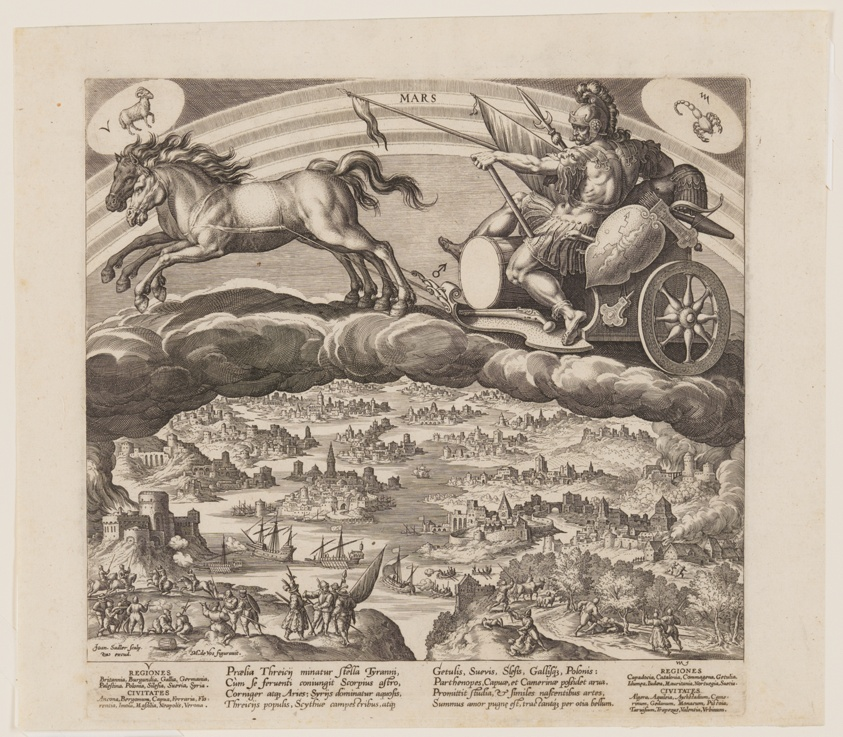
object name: Print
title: Mars, from The Seven Planets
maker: Jan Sadeler I (Flemish, 1550–1600); after Maarten de Vos (Flemish, 1532–1603)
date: 1585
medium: Engraving on ivory laid paper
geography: Flanders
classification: engraving; paper; print; prints and drawing